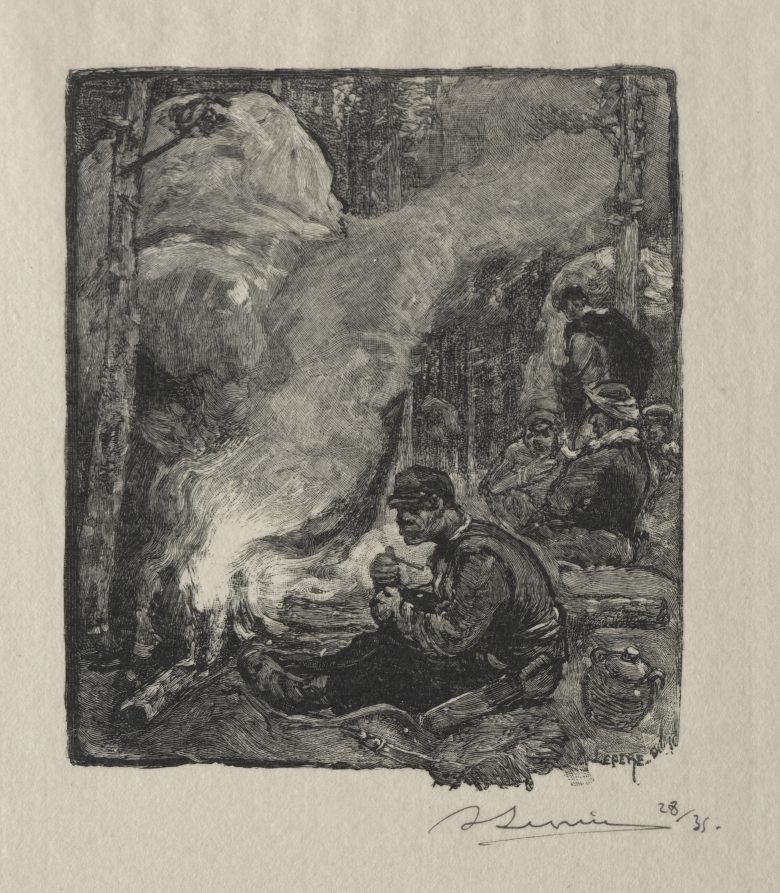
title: Repas des Bûcherons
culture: France, 19th century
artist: Auguste Louis Lepère (French, 1849–1918)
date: 1887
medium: wood engraving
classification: Print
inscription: On block, lower right corner: "A. Lepère"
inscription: Signed in ink, 28/35